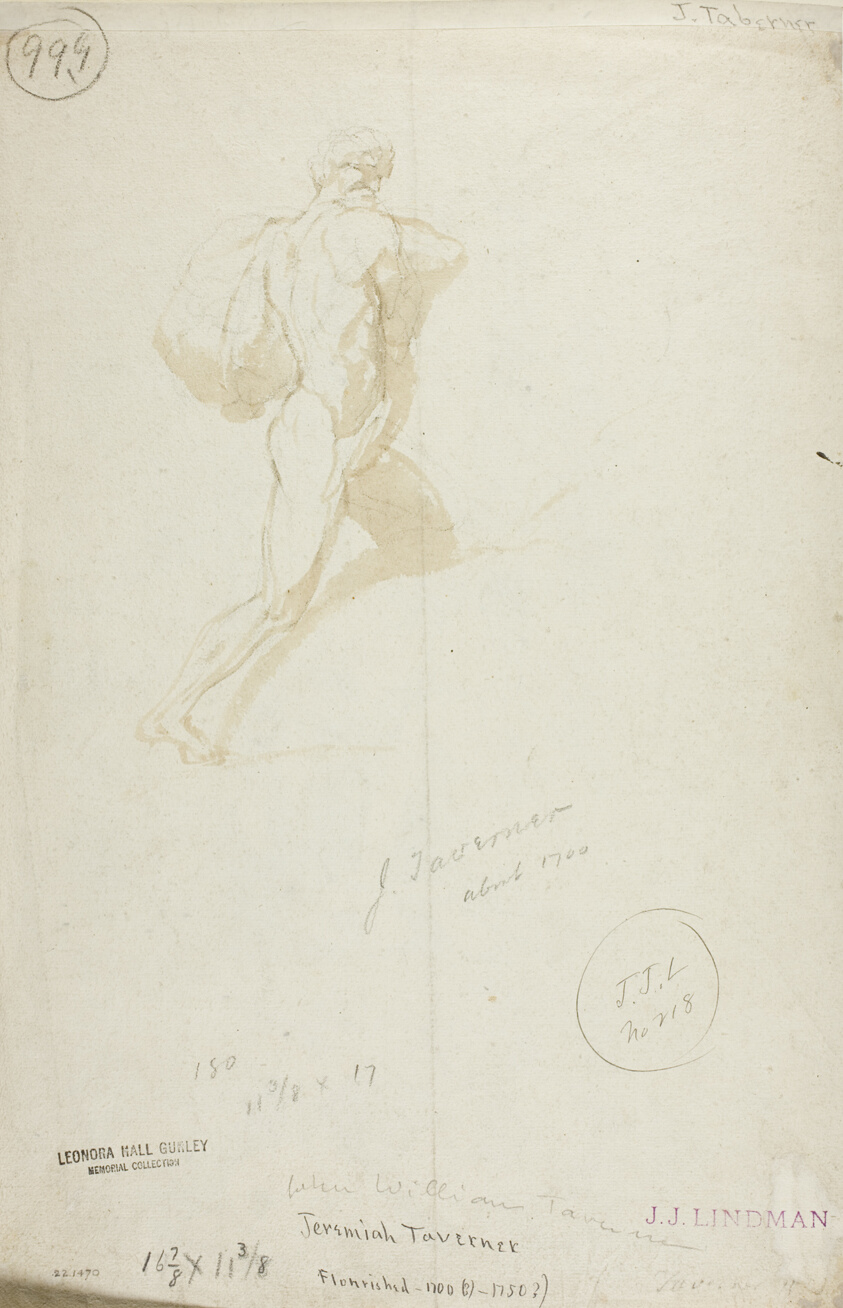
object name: Drawing and Watercolor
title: Polyphemus Throwing Boulder at Acis, with Galatea (recto), and Pholyphemus Lifting Boulder (verso)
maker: John William Taverner (English, 1703-1772)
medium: Black chalk, and brush and gray wash (recto), and black chalk, and brush and brown wash (verso), on ivory laid paper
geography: England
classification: chalk; drawings (visual works); prints and drawing